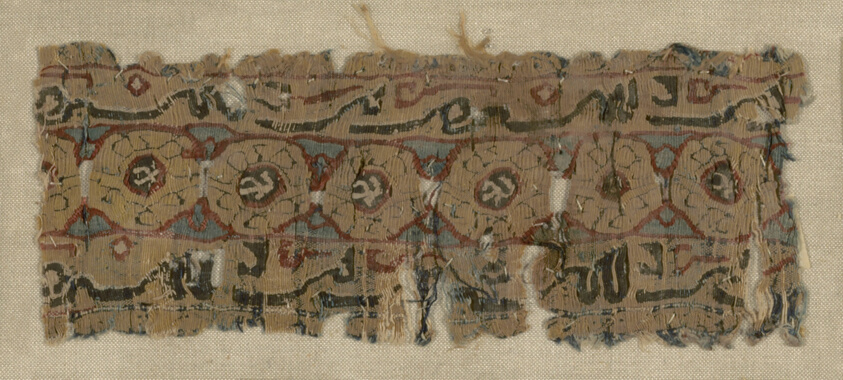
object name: Textile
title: Fragment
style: fatimid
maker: Egypt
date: Fatimid period (969–1171)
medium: Border fragment, tapestry silk weft on dark blue silk warp; twisted rope design in yellow on outside edges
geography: Egypt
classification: textile; weaving